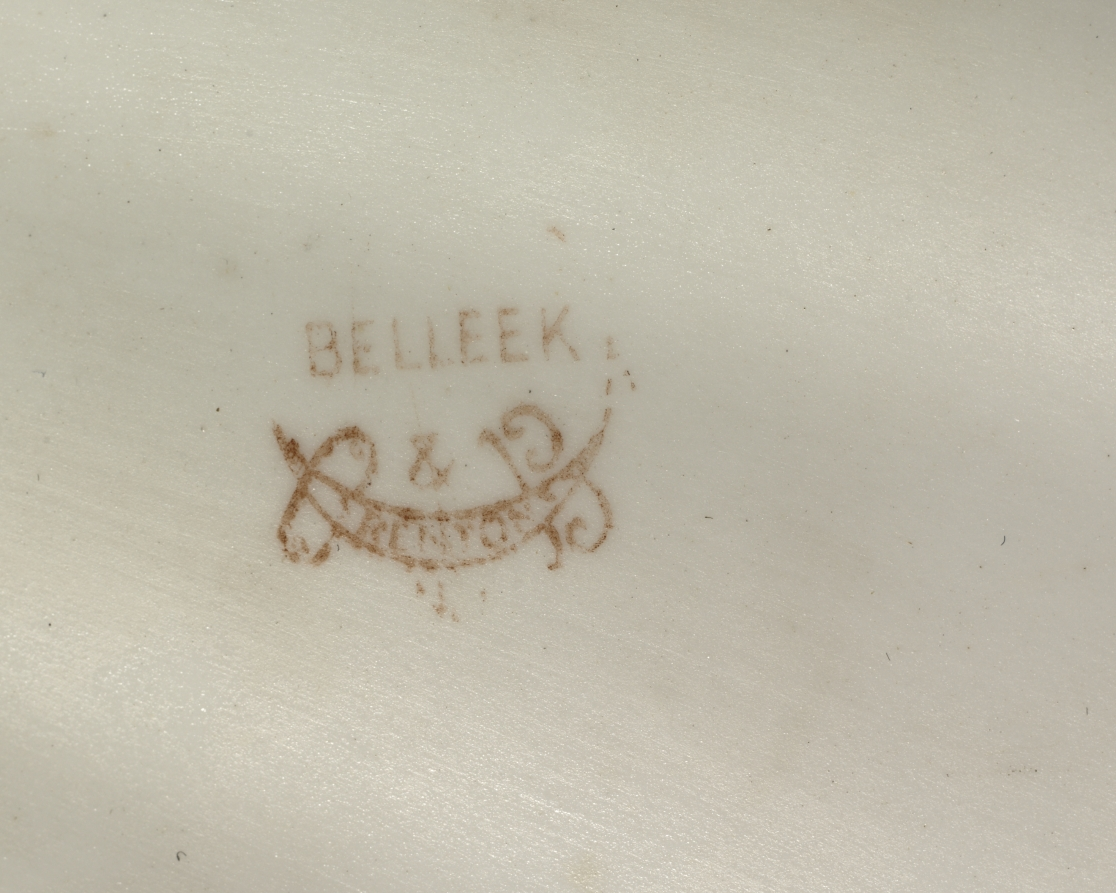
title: Tray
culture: America, New Jersey, Trenton, late 19th century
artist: Ott & Brewer Company (American)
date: 1882–1890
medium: porcelain with gilt decoration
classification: Ceramic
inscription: "Belleek,&" is printed above a horizontal crescent moon with the word "Trenton" in it. Initials "0" and "B" are printed over each tip of the crescent.